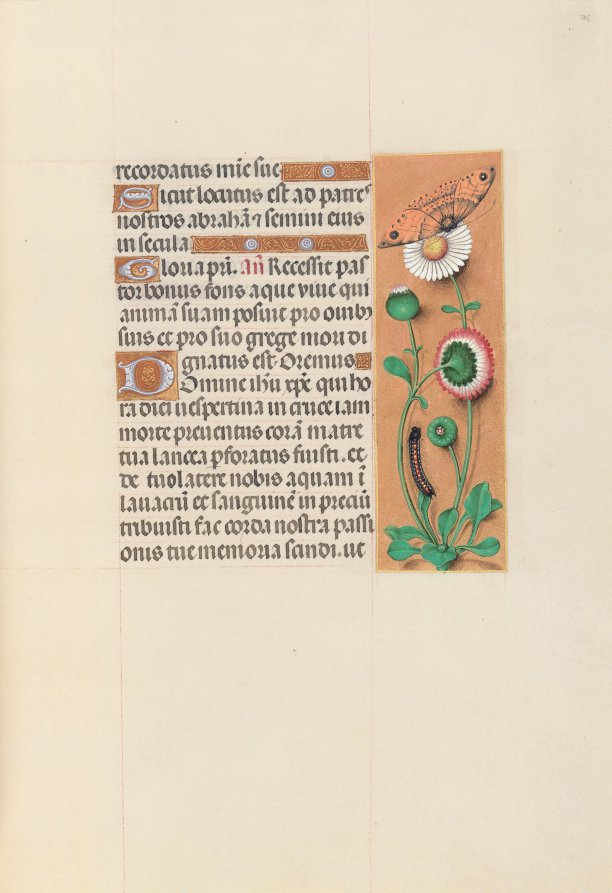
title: Hours of Queen Isabella the Catholic, Queen of Spain: Fol. 76r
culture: Flanders, Ghent and Bruges, late 15th century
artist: Master of the First Prayerbook of Maximillian (Flemish, c. 1444–1519)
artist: and Associates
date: c. 1500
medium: ink, tempera, and gold on vellum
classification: Bound Volume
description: This manuscript was illuminated by a circle of at least five highly organized manuscript painters active in the Flemish cities of Ghent and Bruges. The principal illuminator was Alexander Bening, who painted the majority of the book's miniatures. Manuscripts produced by this circle of artists are renowned for the decoration of their borders, which typically feature a rich variety of realistically-painted flowers, birds, and butterflies. This prayer book, called a book of hours, was intended not for a cleric, but for the private devotions of a lay person-in this case, Isabella the Catholic, Queen of Spain (1451-1504). Isabella's coat of arms embellishes the book's frontispiece. It is unlikely that the book was commissioned by the Queen herself; rather, she probably received it as a diplomatic gift from someone courting her patronage, perhaps Cardinal Francisco Jimenez de Cisneros. A Franciscan friar, Jimenez was dependent upon Isabella for his advancement, first to the post of Queen's confessor in 1492, and then to Archbishop of Toledo in 1495.